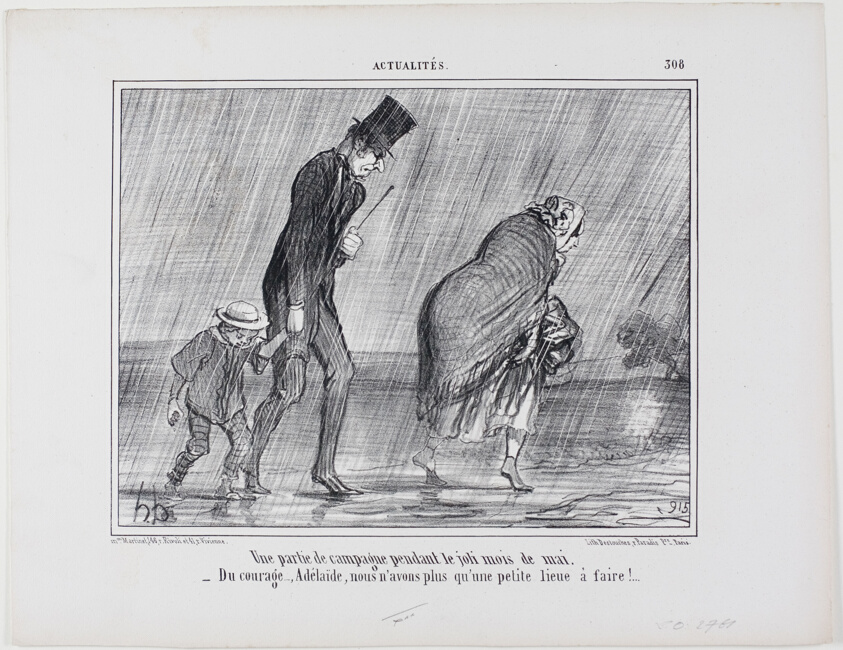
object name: Print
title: A country excursion during the beautiful month of May. “– Courage... Adelaïde it's just another league to go,” plate 308 from Actualités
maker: Honoré Victorin Daumier; French, 1808-1879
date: 1856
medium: Lithograph in black on ivory wove paper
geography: France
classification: lithograph; print; prints and drawing